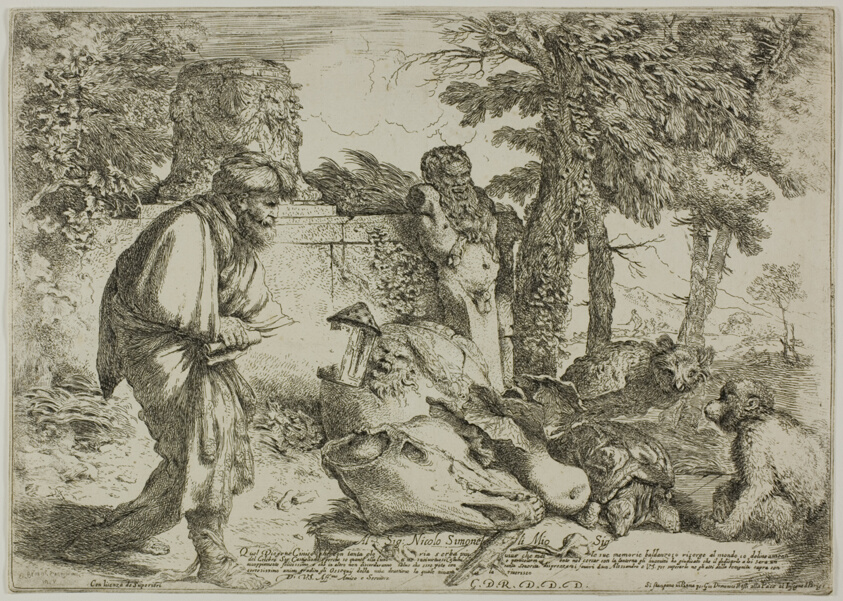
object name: Print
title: Diogenes Seeking an Honest Man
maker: Giovanni Benedetto Castiglione (Italian, 1609-1664)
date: 1645–47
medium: Etching on cream laid paper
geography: Italy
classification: etching; print; prints and drawing